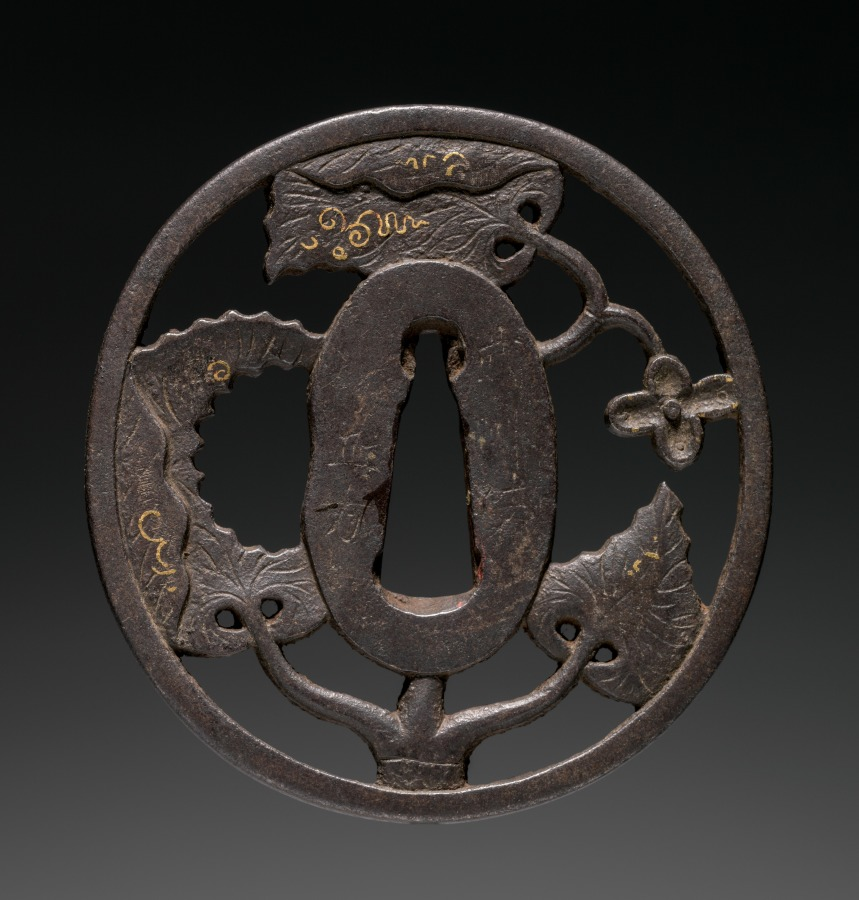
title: Sword Guard (Tsuba) with Flowering Vine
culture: Japan, Edo period (1615–1868)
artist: Masakata (Japanese)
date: c. 1815–50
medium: iron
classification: Arms and Armor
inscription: Signature: Masakata